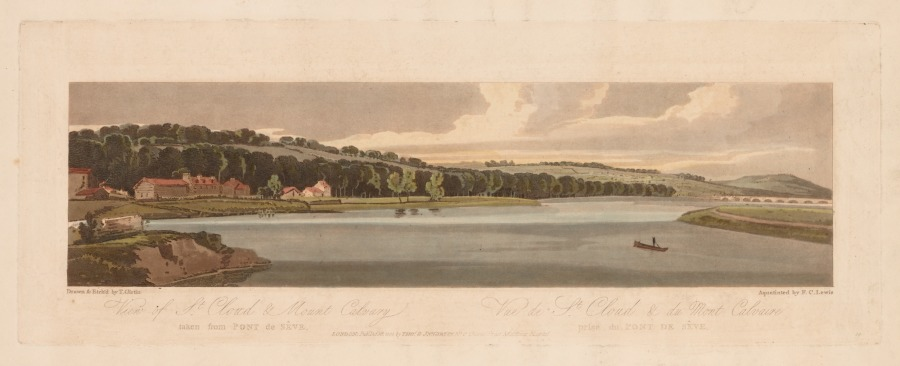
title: A Selection of Twenty of the Most Picturesque Views in Paris: View of St. Cloud & Mount Calvary taken from Pont de Sêve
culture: England, 19th century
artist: Thomas Girtin (British, 1775–1802)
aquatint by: Frederick Christian Lewis (British, 1779–1856)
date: 1802, printed 1810 or after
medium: softground etching and aquatint printed in brown, hand-colored with watercolor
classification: Print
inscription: In plate; Drawn & Etch'd by Thos Girtin; Aquatinted by F. C. Lewis; LONDON: Pubd Decr 16, 1802 by Thos & JNo Girtin, No. I, Little Newport Street, Gerrard Street, Soho.